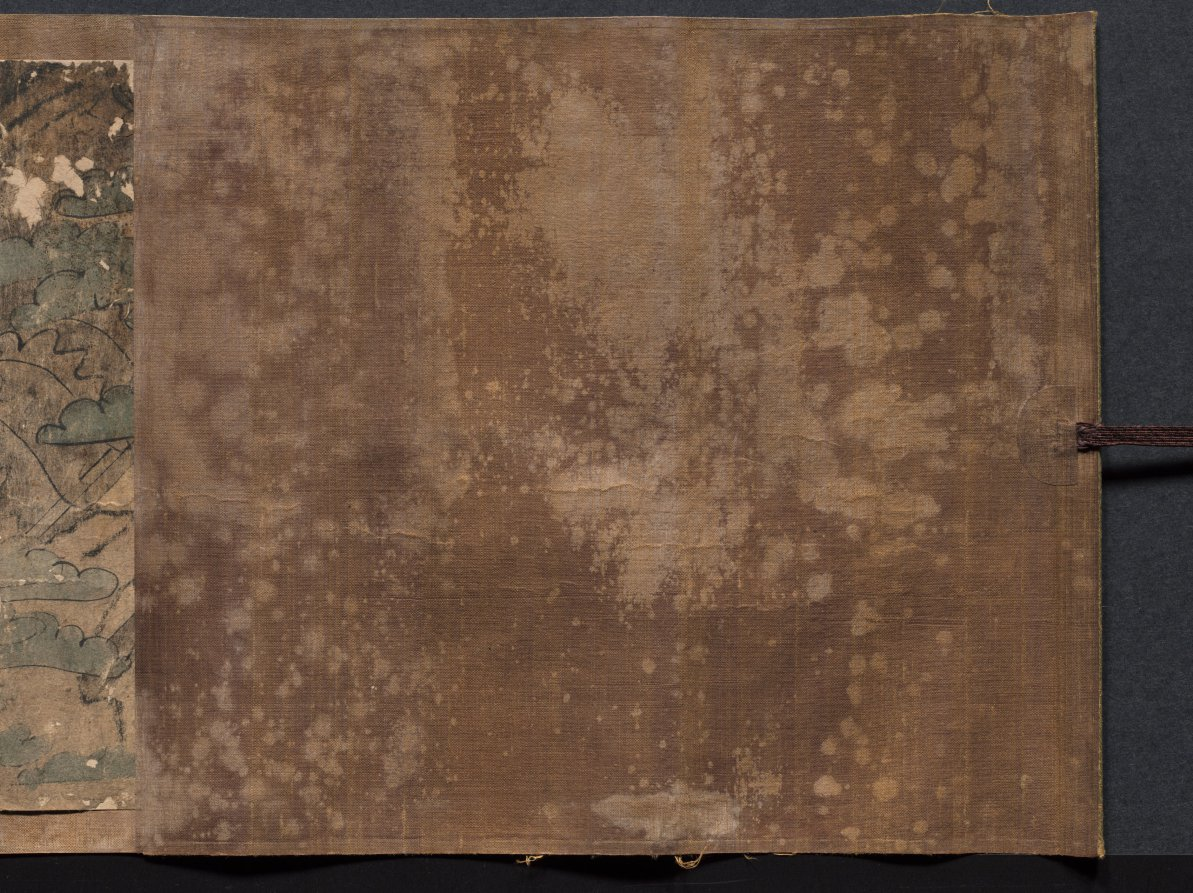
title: Oeyama Engi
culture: Japan, Edo period (1615–1868)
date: 1615–1868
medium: one of a pair of handscrolls; ink and color on paper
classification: Painting